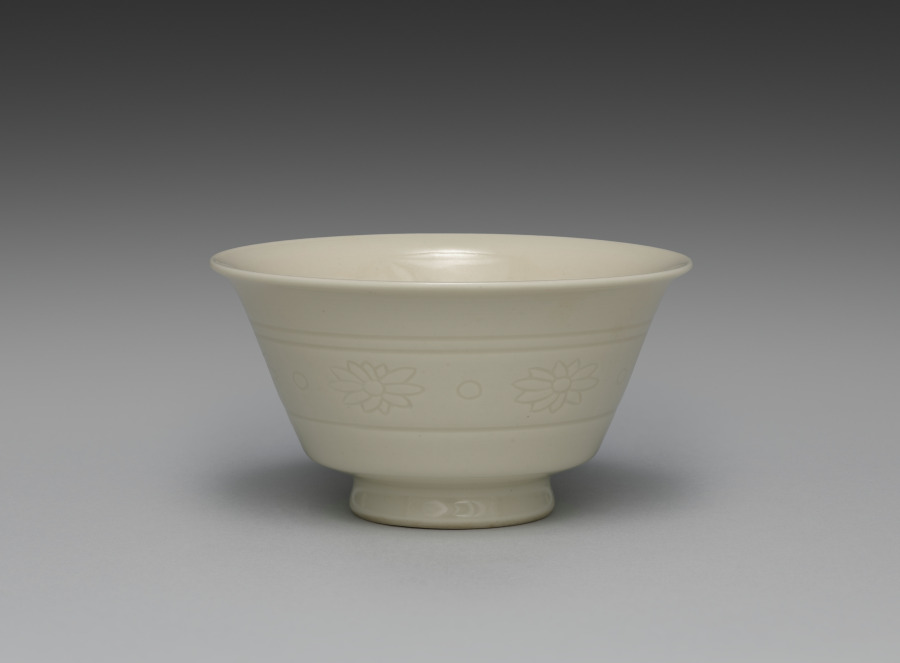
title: Teacup from Teacups with Floral Band Motif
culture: Japan, Meiji period (1868–1912)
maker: Seifū Yohei III (Japanese, 1851–1914)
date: 1893–1914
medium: One from a set of five cups; porcelain with incised decoration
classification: Ceramic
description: The five sencha teacups in this set are decorated with incised flowers and dots between a double band at the top and a single band at the bottom. They are in Yohei III’s creamy taihakuji body and glaze. In their motifs, they are quite similar to an incense burner by Yohei III (see CMA 2022.180), but the flowers are even more simple in design, with no open circle at the center. A label affixed to the side of the box refers to them as “sencha cups in emulation of Korean white [ware].” The reference to Korean ware indicates that even though Yohei was more directly inspired by Qing-dynasty wares from the Dehua kilns in Fujian Province in developing his porcelain clay and glaze for works such as these, the general understanding of the continental models still placed them, at least in terms of color, among pieces broadly associated in Japan with Korean white wares. The delicate cups are thinly potted, so they have a highly desirable translucency.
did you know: The delicate cups in this set are thinly potted, so they have a highly desirable translucency.